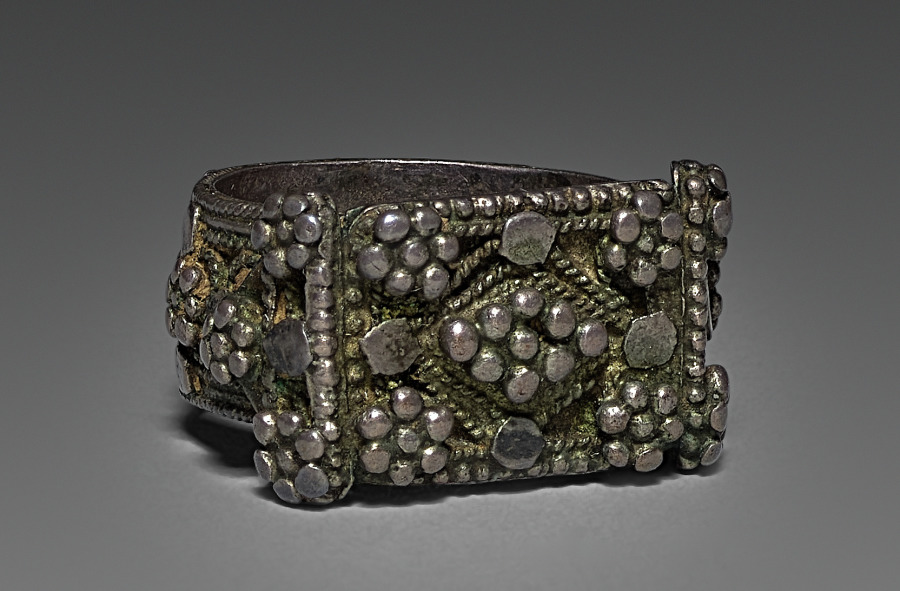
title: Ring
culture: India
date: 1800s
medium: silver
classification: Jewelry